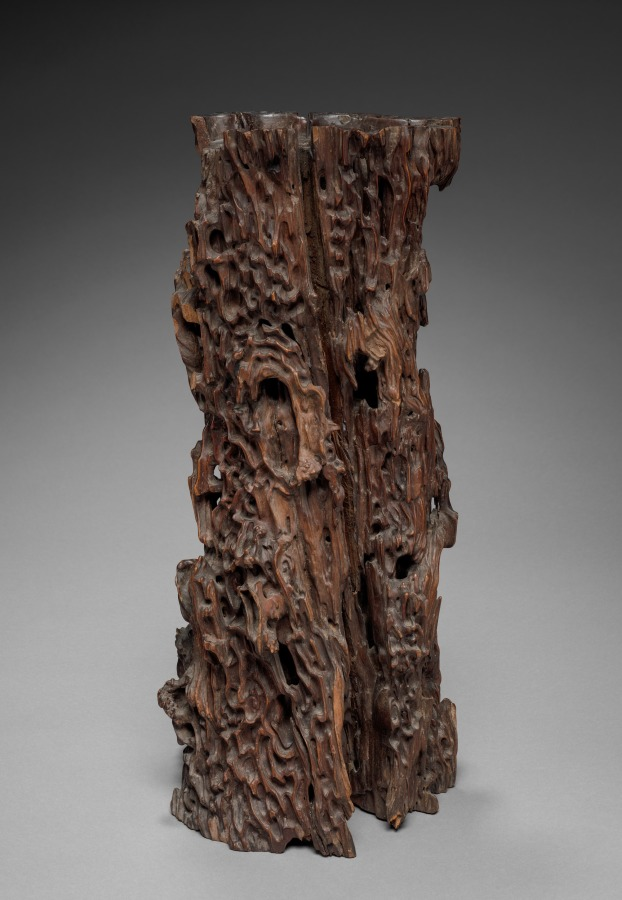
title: Prunus Wood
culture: China, Qing dynasty (1644-1911)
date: 1700–1899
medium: wood carving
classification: Wood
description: The gnarled and twisted form of a prunus stump is carved to accentuate its naturally textured surface. The body is finely polished to create a lustrous patina. Simple wood carvings like this exemplify the Chinese scholars’ taste for natural forms and rustic materials, which in turn reflect the desire to retreat into nature. They were collected and displayed as decorative works of art in the traditional scholars’ studios.